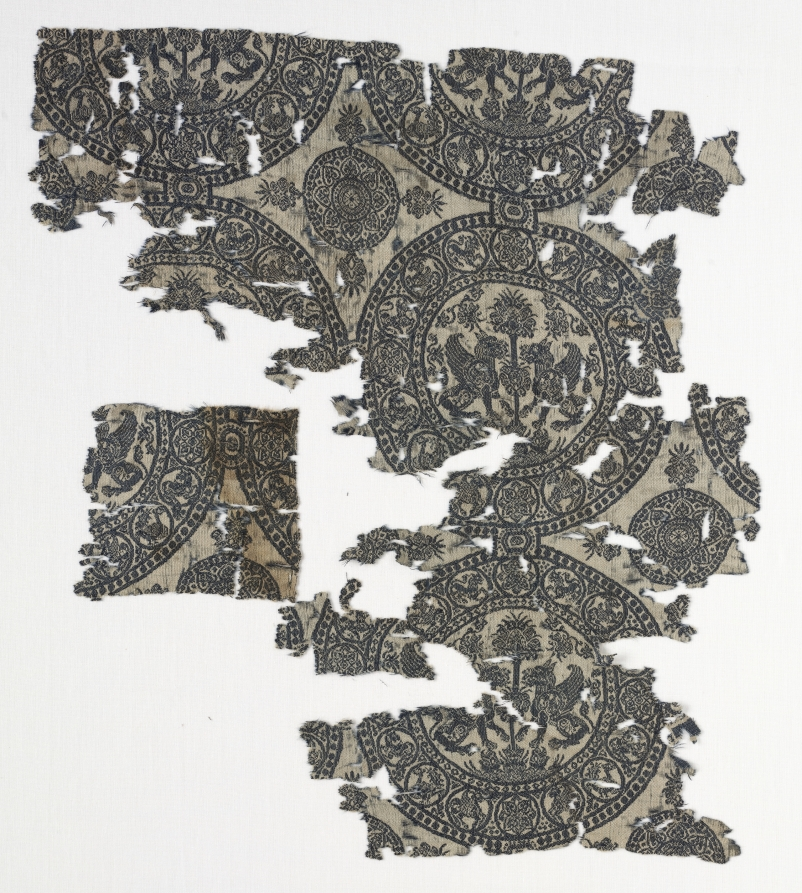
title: Fragment with Griffins in Roundels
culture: Iran or Iraq, in the style of the Seljuq period (1037–1194)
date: before 1982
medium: Silk: lampas weave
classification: Textile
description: This fragment preserves rows of tangent roundels, each containing pair of griffins flanking a tree. Borders of the roundels are ornamented with small medallions enclosing animals or a floral device. The interspaces between roundels are filled with geometric floral figures.